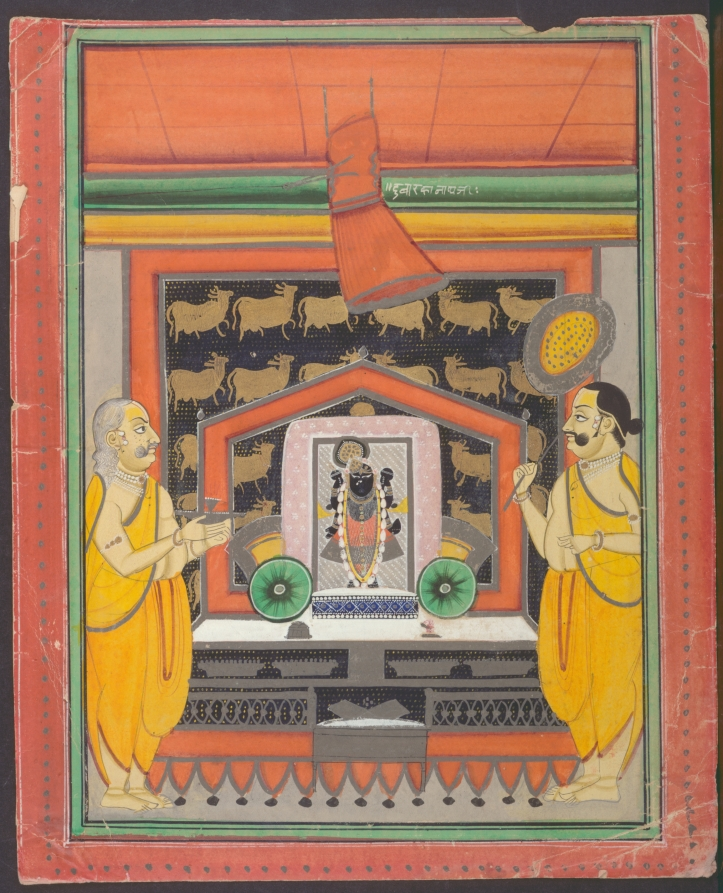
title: Worship of Dvaraka Nathji at Kankroli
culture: Northwestern India, Rajasthan, Rajput Kingdom of Kota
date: c. 1880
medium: Gum tempera and gold on paper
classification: Painting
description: The four-armed sculpture on the altar is understood by followers of the Pushti Marg system as a living embodiment of Krishna, who generated another pair of arms when playing hide-and-seek with his favorite milkmaid, Radha. The sculpture is called Dvaraka Nathji, and his shrine is located in Kankroli, near Nathdwara in northwestern India. The golden cows adorn a textile backdrop (pichvai) behind the sculpture and reference Krishna’s youth in a cowherd village.